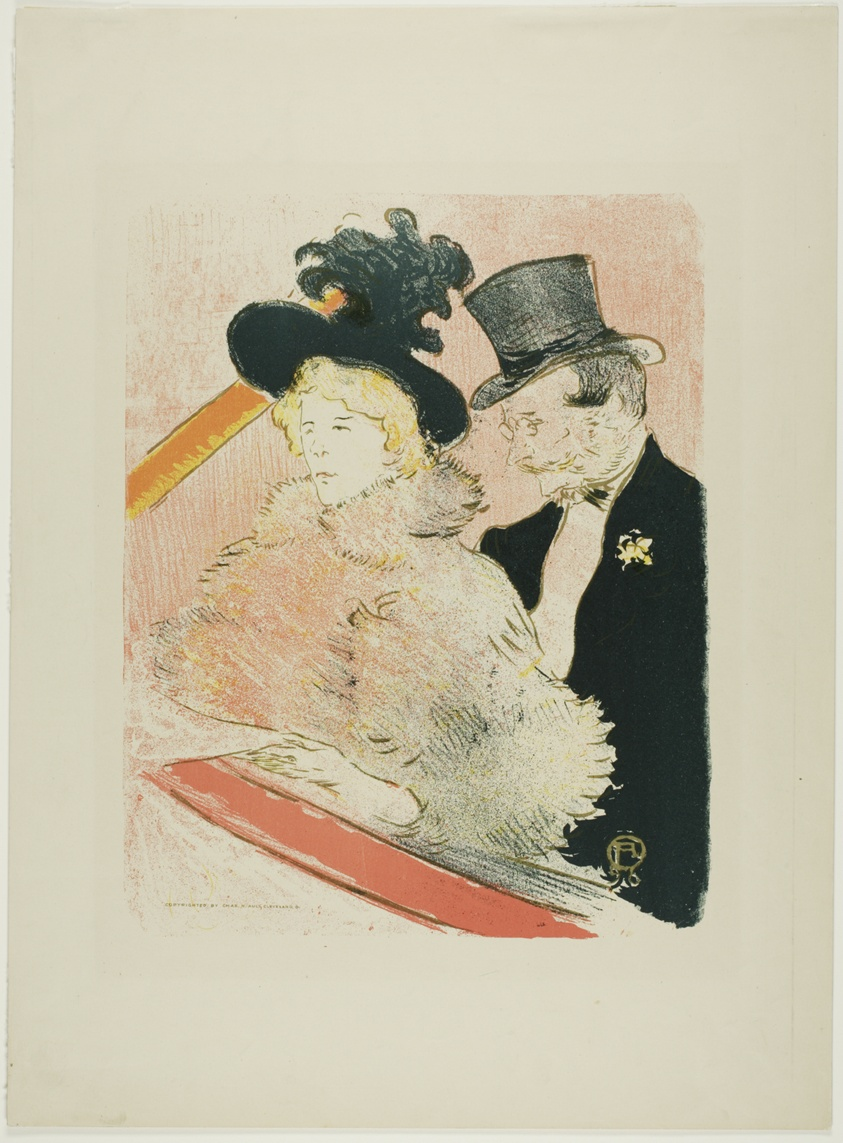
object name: Print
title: At the Concert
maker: Henri de Toulouse-Lautrec (French, 1864-1901)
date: 1896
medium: Color lithograph on cream wove paper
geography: France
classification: zincograph; print; prints and drawing